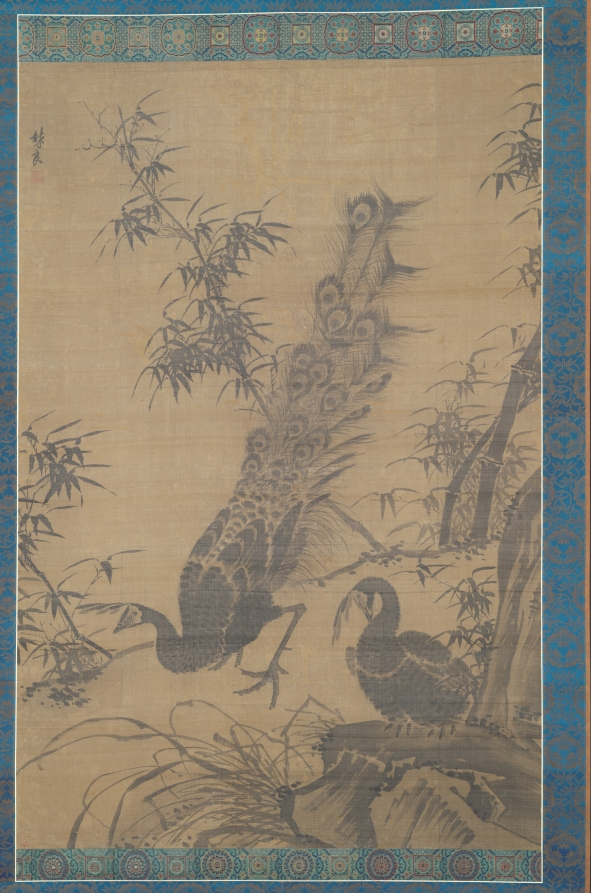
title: A Pair of Peafowl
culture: China, Ming dynasty (1368–1644)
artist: Lin Liang (Chinese, 1416–1480)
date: late 1400s-early 1500s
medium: hanging scroll, ink on silk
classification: Painting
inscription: 林良. [印] 以善圖書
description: The peacock, identified by the flamboyant tail, is paired with a female peahen to its right. In lowering her head, the hen seems to show respect to the male peacock. With his articulate brushstrokes and strong contrasting tones, Lin Liang’s representation in black ink appears as vivid as Yin Hong’s colorful peacock (1974.31). The painter skillfully uses wet and dry ink as well as broad and thin washes to represent the plumage of the bird. The surface of the rocks, depicted in powerful sweeping strokes, recalls the landscape painting style of the Zhe School, which specialized in expressive brushwork.